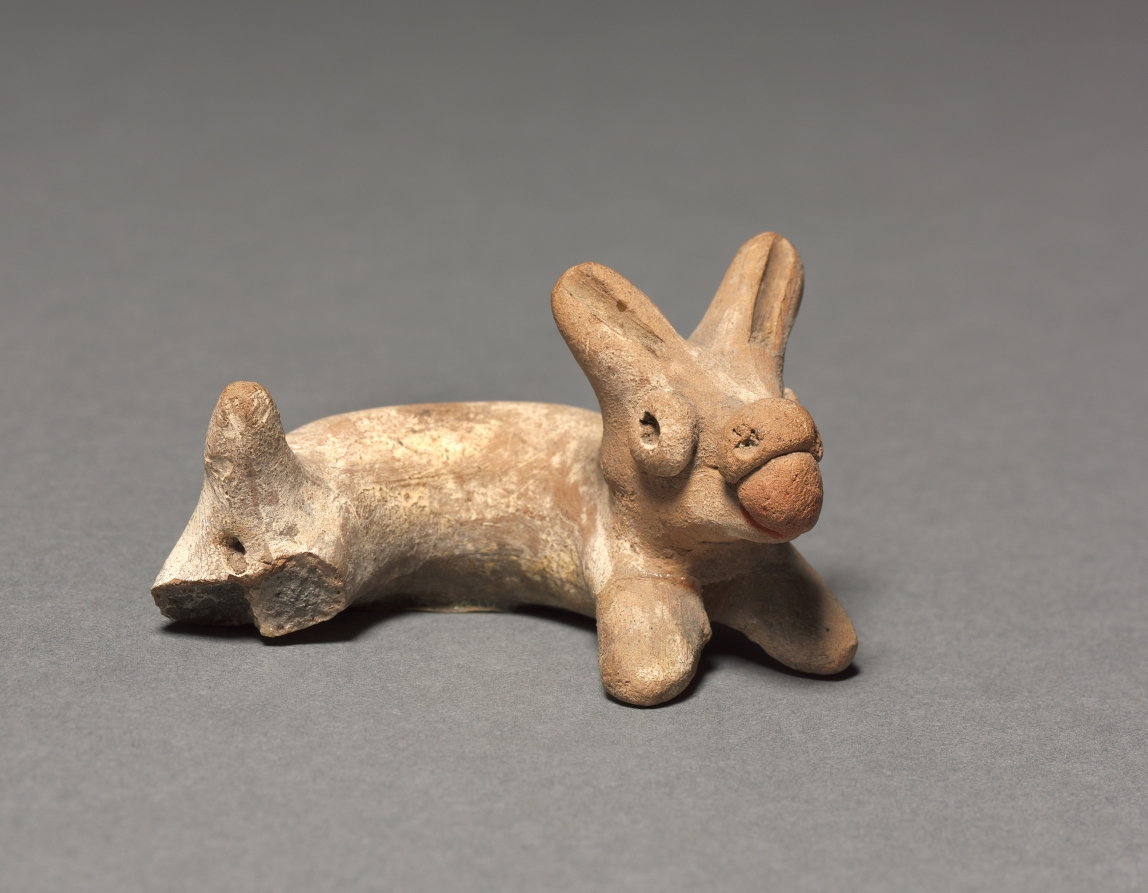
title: Animal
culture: Mexico, Western, Colima (?)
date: 200 BCE–300 CE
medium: terracotta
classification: Ceramic